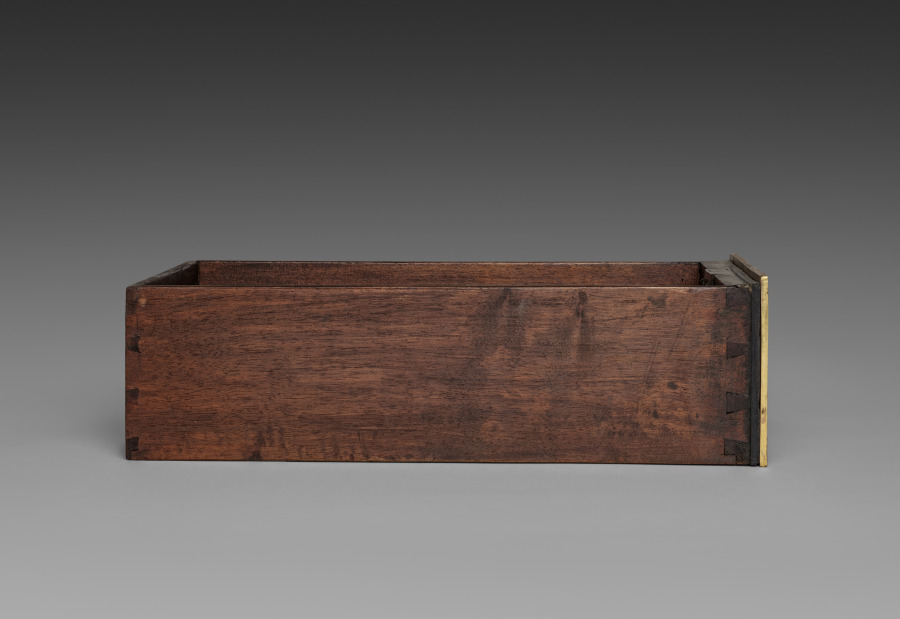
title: Side Drawer for Cabinet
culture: France, late 17th Century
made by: André-Charles Boulle (French, 1642–1732)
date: c. 1690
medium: ebony, marquetry in metal and tortoise shell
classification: Furniture and woodwork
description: Appointed cabinetmaker to King Louis XIV in 1672, André-Charles Boulle became a master of furniture making in France during the late 1600s until his death in 1732. Known primarily for his use of marquetry, in which metal patterns are inlaid into tortoiseshell then applied within the veneered surface of the furniture, Boulle established a level of quality and craftsmanship few others could achieve. As a result, his work found favor at the royal court and among other aristocrats and diplomats eager to impress the king. The inclusion of a medallion depicting Louis XIV within the bronze decoration of this chest would have identified the owner with the royal court. Often exhibiting stout architectural proportions with elegant groups of inlaid motifs such as the parrot on the central panel of this chest, Boulle’s designs are an example of the intellectual fashion for contrasting ideas, materials, and motifs.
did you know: Originally designed to sit atop an elaborate tall stand, this chest was likely altered in the late 1700s to reduce its scale and height.